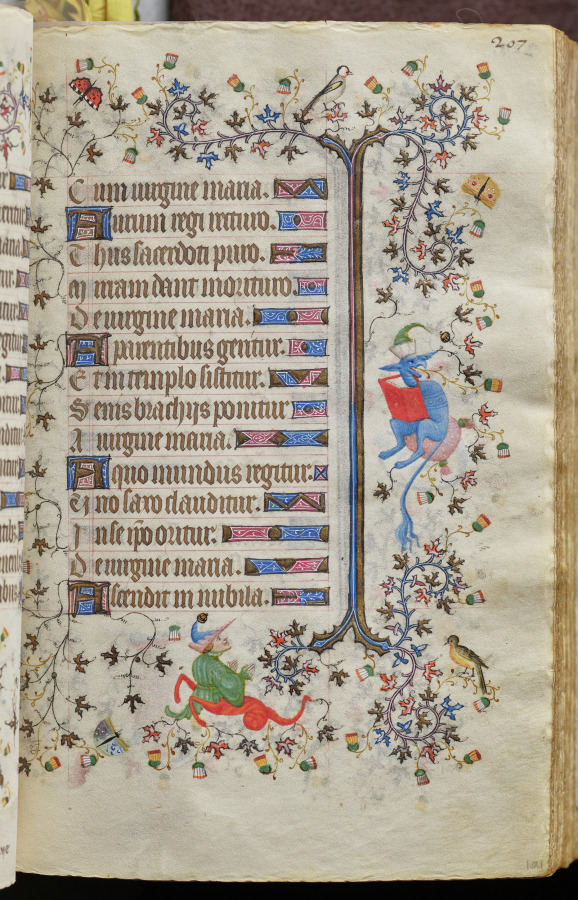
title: Hours of Charles the Noble, King of Navarre (1361-1425): fol. 104r, Text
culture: France, Paris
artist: Master of the Brussels Initials and Associates (French)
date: c. 1405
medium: ink, tempera, and gold on vellum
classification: Bound Volume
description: This precious volume was obviously highly prized by its owner, the French-born King of Navarre, who had his coat of arms painted on no less than twenty folios. Rather than directly commissioning this manuscript from a specific workshop, it seems that Charles the Noble acquired his book of hours -- perhaps ready-made for the luxury market -- while on a trip to Paris in 1404-05. A collaborative effort, six painting styles are evidenced within the pages of this codex, those of two Italians, two Frenchmen, and two Netherlanders. The painter who was responsible for the planning and decoration of the book, and who produced seventeen of the large miniatures, was a Bolognese artist known as the Master of the Brussels Initials. His principal assistant, responsible for most of the borders, was a Florentine who signed his name "Zecho" da Firenze on folio 208 verso.